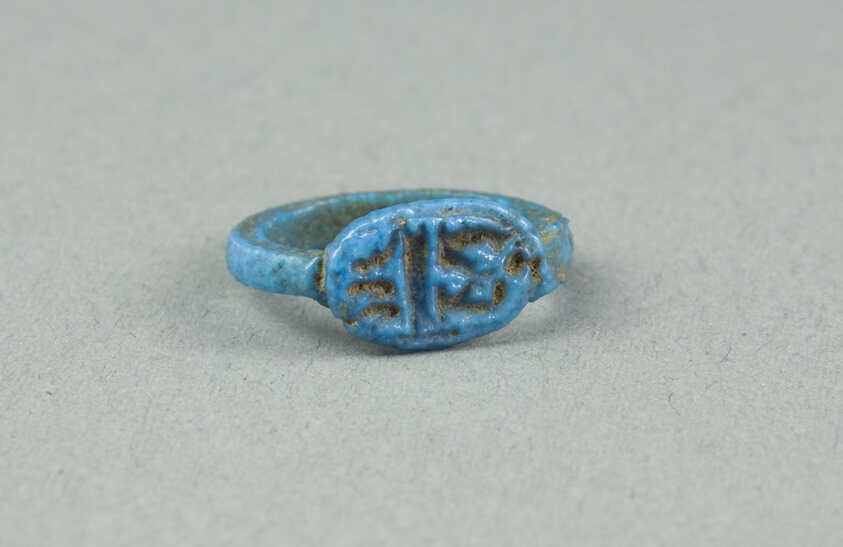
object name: Costume and Accessories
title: Ring: Ramesses-mry-Amun?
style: nineteenth dynasty, new kingdom, egyptian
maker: Egyptian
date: New Kingdom, Dynasty 20, reign of Ramesses V? (about 1147–1143 BCE)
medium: Faience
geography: Egypt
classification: ceramics; jewelry; ancient art; costume; faïence (composite material)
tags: gods (deities)